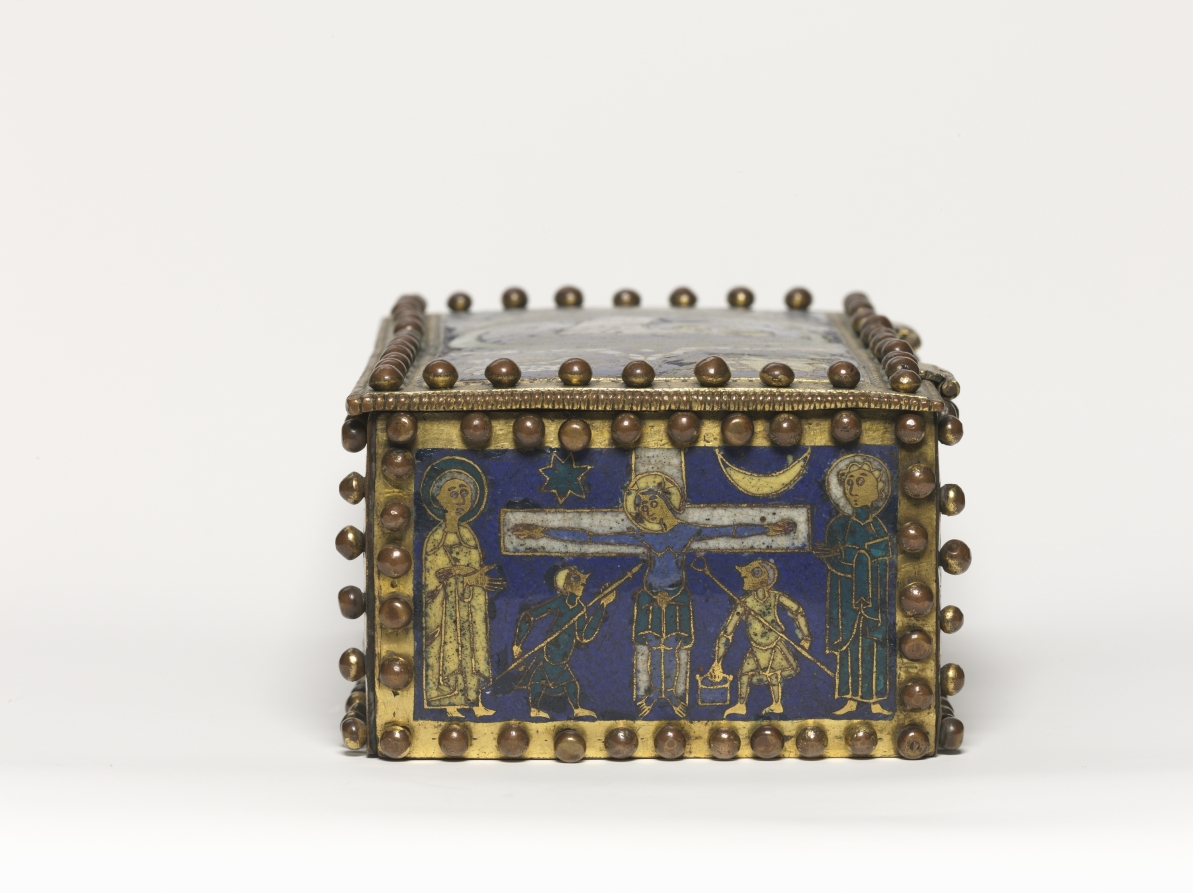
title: Casket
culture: Northern Germany?, Romanesque period, 12th century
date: 1100–1150?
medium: gilded copper, champlevé enamel, wood core (modern)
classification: Enamel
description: This champlevé enamel casket belongs to a distinct group of nine closely related objects characterized by the vivid colors of their enamel decoration and rows of spherical pins placed along the edges of each enamel plaque. Recent X-ray analysis suggests that the casket originally functioned as a stand for an altar cross. Such a function is attested to in at least three related caskets (in Copenhagen, Hildesheim, and Berlin). The casket’s iconographic program features the 12 apostles, placed under arcades (on the long sides), the Crucifixion and Christ in Majesty (on the short sides), and the Lamb of God surrounded by the symbols of the four Evangelists (on the lid).